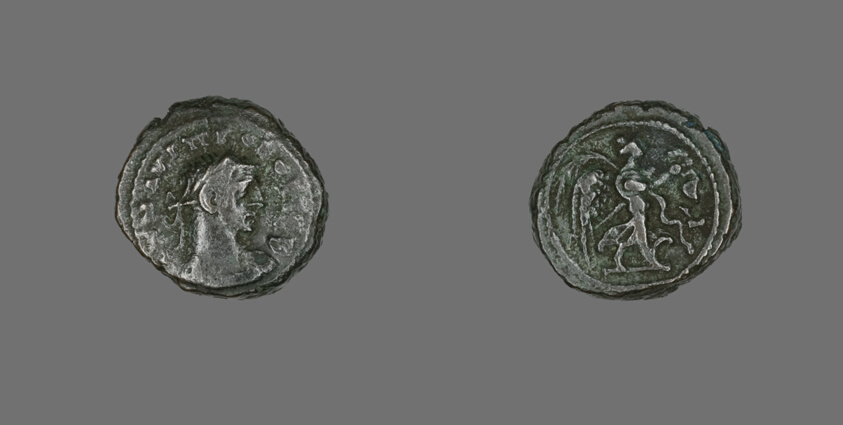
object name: Coin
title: Tetradrachm (Coin) Portraying Emperor Probus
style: greco-roman (egyptian)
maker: Roman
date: 279-280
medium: Billon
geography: Alexandria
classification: coin; ancient art